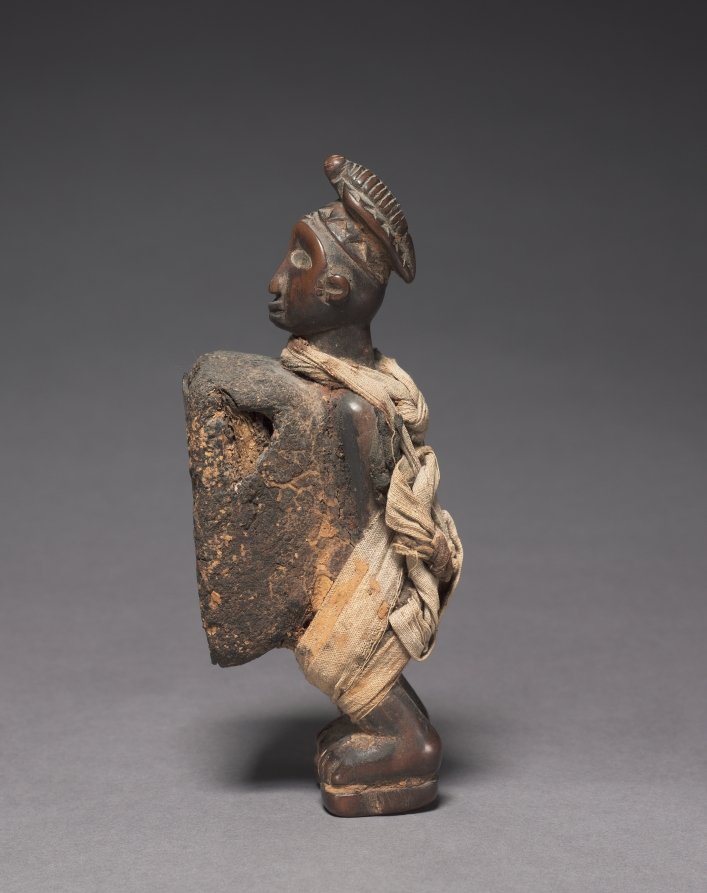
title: Male Figure (Nkisi)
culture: Africa, Central Africa, Democratic Republic of Congo (most likely), Cabinda, or Republic of the Congo, probably Yombe-style maker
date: late 1800s-early 1900s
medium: Wood, organic material (including resin), metalized glass, and cloth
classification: Sculpture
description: Nkisi is often associated with the word spirit, as these figures are believed to host a variety ancestral spirits. With an intact mirror-covered stomach cavity, this figure was not decommissioned before sale or disposal, deeming its particular powers sustained. The cloth knots and carvings suggest that it was used to bind agreements or oaths, and to reconcile social and cosmological contradictions.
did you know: The medicinal substances remain intact in this particular figure, which is rare, as most were decommissioned before museum acquisition.